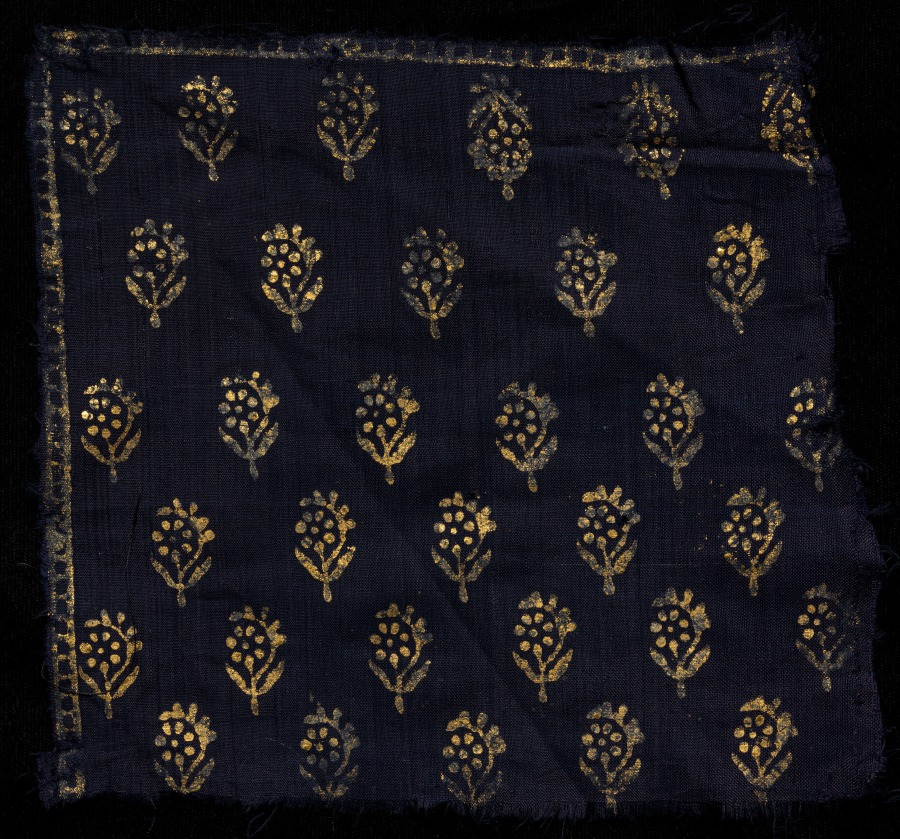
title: Fragment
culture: India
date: 1800s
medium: Block printed with gold leaf (varak) on dark blue dyed plain weave cotton muslin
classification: Textile